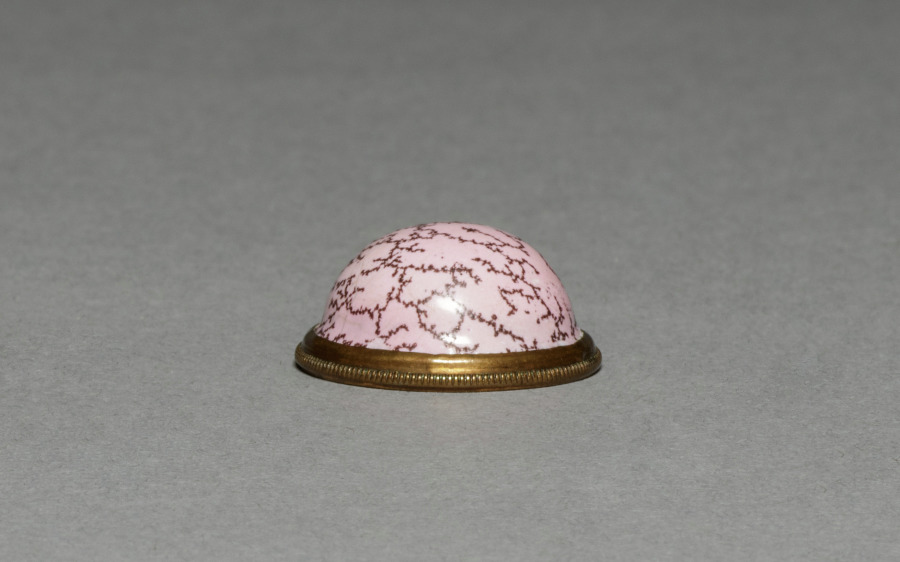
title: Lid for a Thimble Container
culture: England, mid-18th century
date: mid-1700s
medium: enamel on metal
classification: Enamel